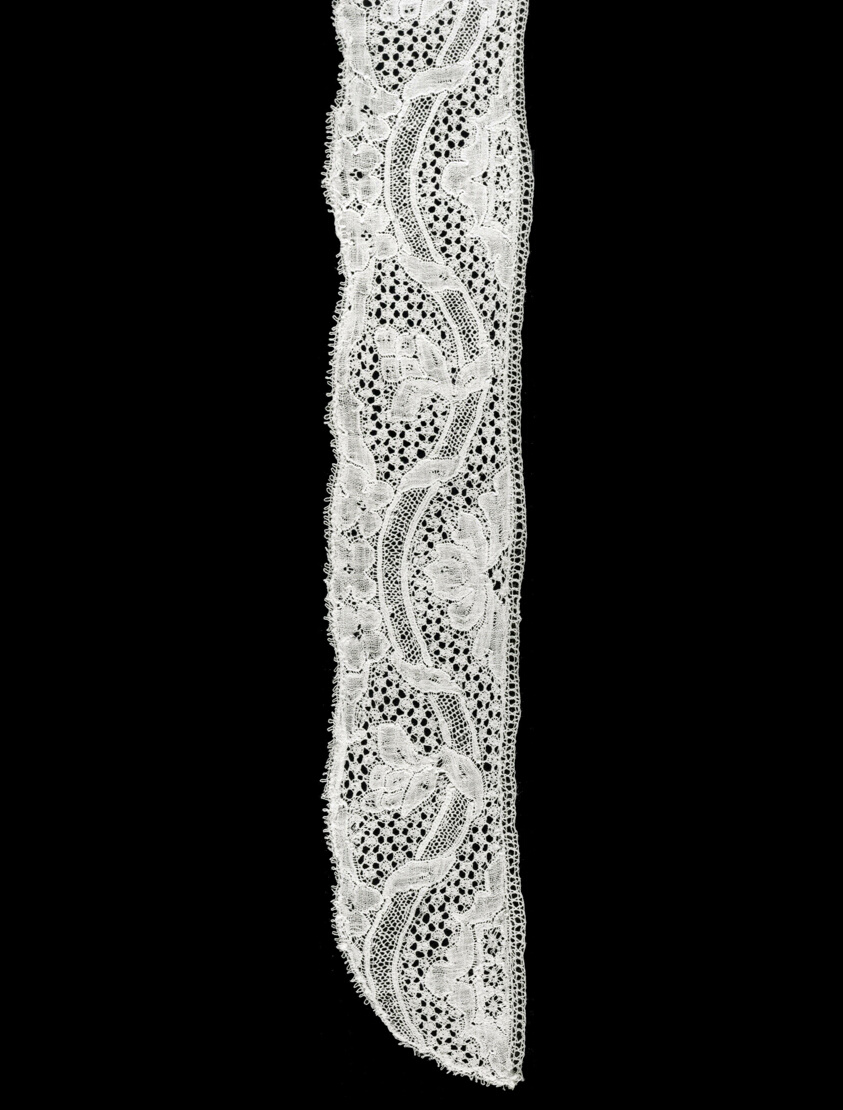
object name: Textile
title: Border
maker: Flanders, Mechlin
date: 1725/75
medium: Linen, bobbin straight lace of a type known as "Mechlin" with a snowflake mesh ground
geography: Mechelen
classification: textile; lace - bobbin; lace